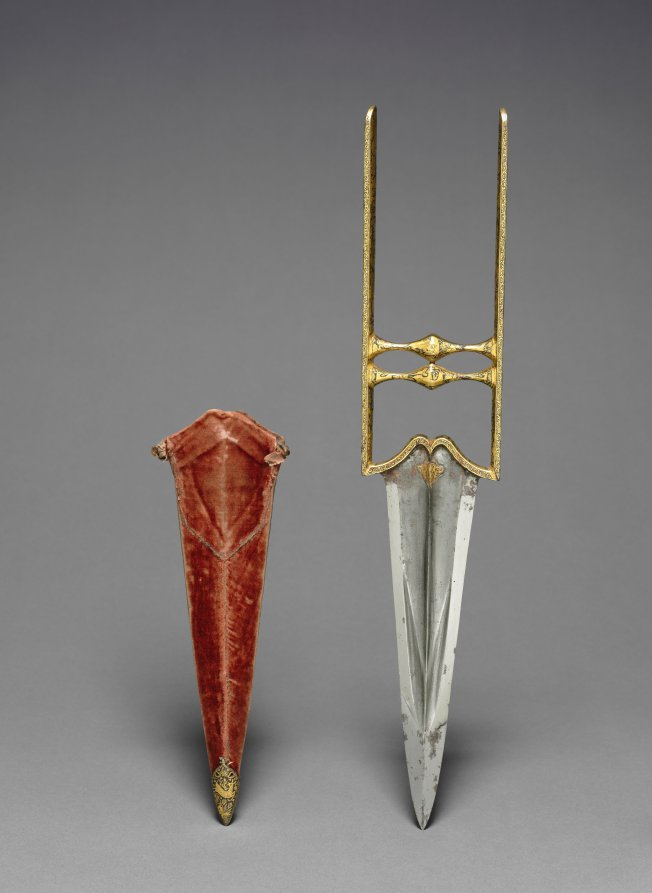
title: Katar dagger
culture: India, Mughal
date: 1700s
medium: Iron handle with gold inlay; steel blade; wooden sheath with velvet cover, brass boss, iron tip with gold inlay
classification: Arms and Armor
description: Stabbing daggers called katar were distinctive to India and often worn by soldiers and courtiers, tucked into their belts. Covering the entire handle are tiny scenes of lions and cheetahs hunting deer and buffalo in rocky wooded settings.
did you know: The ornament on the handle faces up from the perspective of a right-handed user, on all sides.